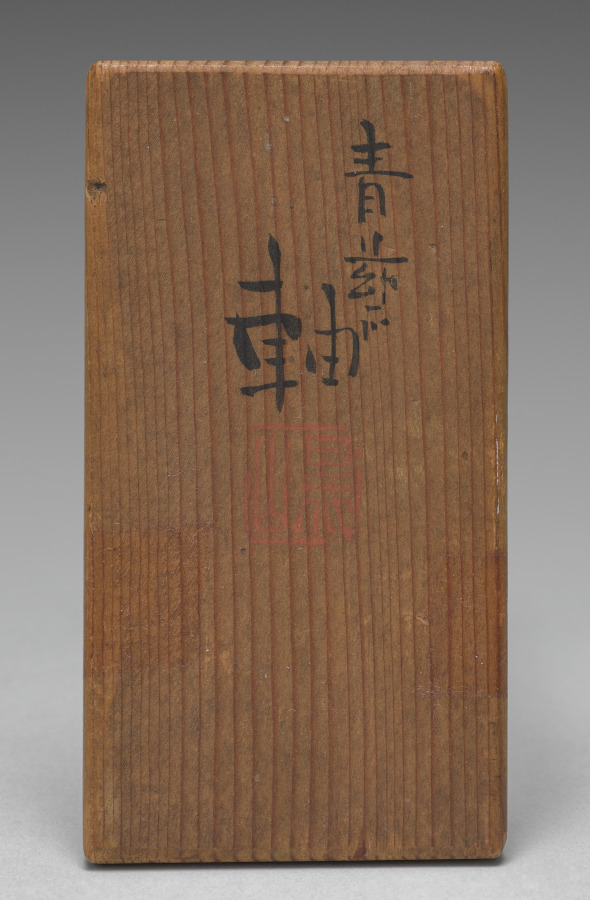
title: Roller Ends for Hanging Scroll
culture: Japan, Meiji period (1868–1912)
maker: Seifū Yohei III (Japanese, 1851–1914)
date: 1893–1914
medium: Pair of hanging scroll roller ends; porcelain with green glaze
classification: Ceramic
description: Before entering into his apprenticeship with Yohei II, Seifū Yohei III trained as a painter in Osaka. He continued to paint throughout his career as a ceramist. As part of his ceramic practice, Yohei III also made roller ends to be placed at either end of the wooden dowel around which the lower part of a hanging scroll mounting is wrapped. These served both as weights for the painting and as knobs for handling it when rolling and unrolling. The pair here is made of porcelain with a green glaze.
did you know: These are the roller ends for the hanging scroll by Seifū Yohei III, Rain Clearing over a Summer’s Mountain, CMA 2022.151.